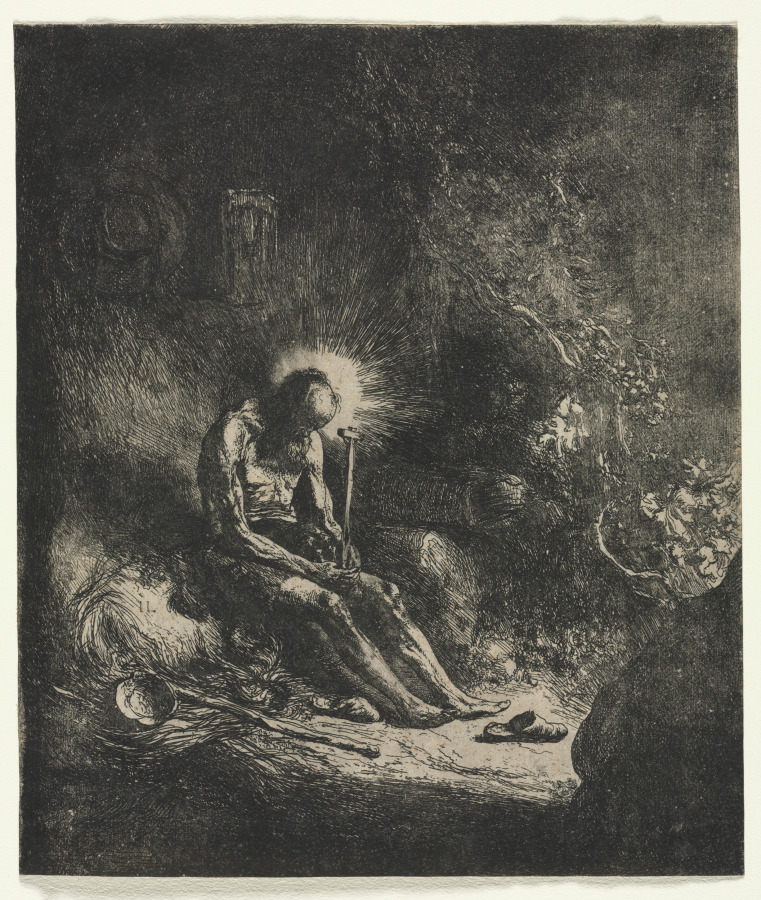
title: St. Jerome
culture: Netherlands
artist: Jan Lievens (Dutch, 1607–1674)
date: 1631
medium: etching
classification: Print